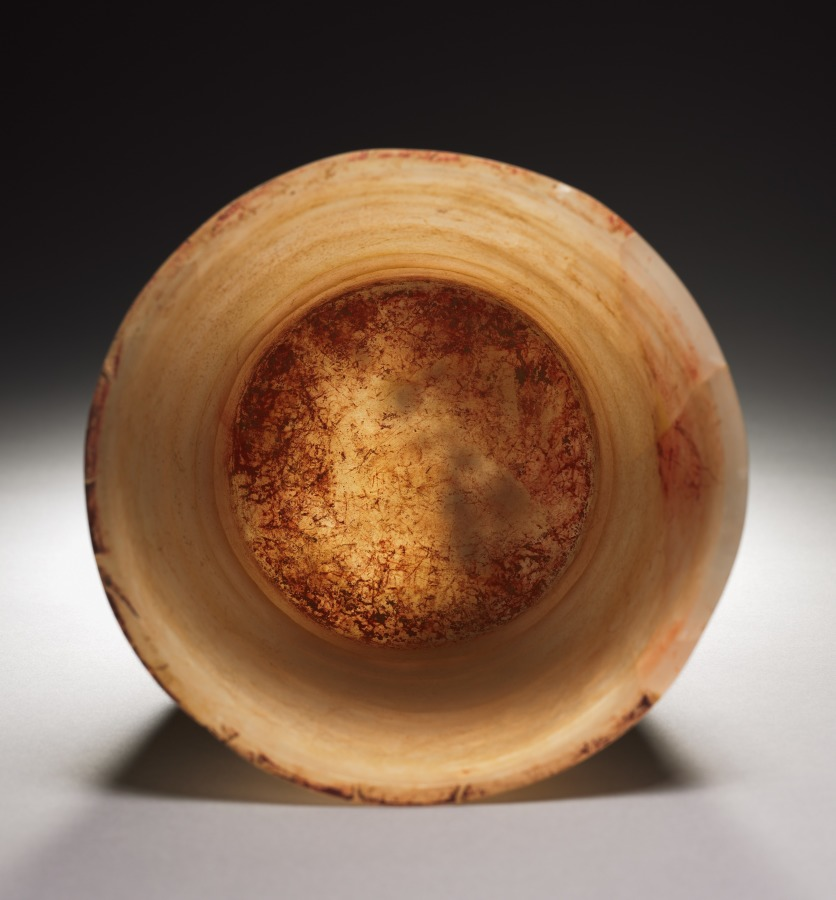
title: Offering Group: Vessel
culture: Mexico, Guerrero(?), San Jerónimo de Juárez, Xochicalco style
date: c. 800–1200(?)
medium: travertine or tecali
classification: Sculpture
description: The objects in this group, all with traces of red pigment, are said to have been found together, the shells and greenstone plaque inside the translucent stone vessel. A similar offering was found in a pyramid ornamented with feathered serpents at Xochicalco, a site south of the Valley of Mexico.